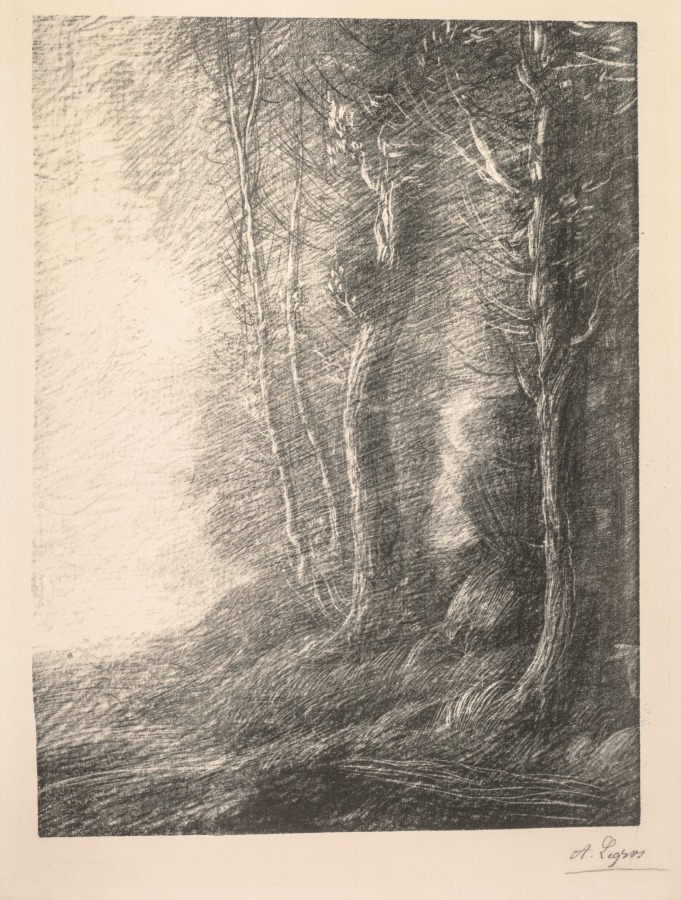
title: Landscape (Paysage)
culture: France, 19th-20th century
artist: Alphonse Legros (French, 1837–1911)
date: c. 1857–1911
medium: etching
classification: Print